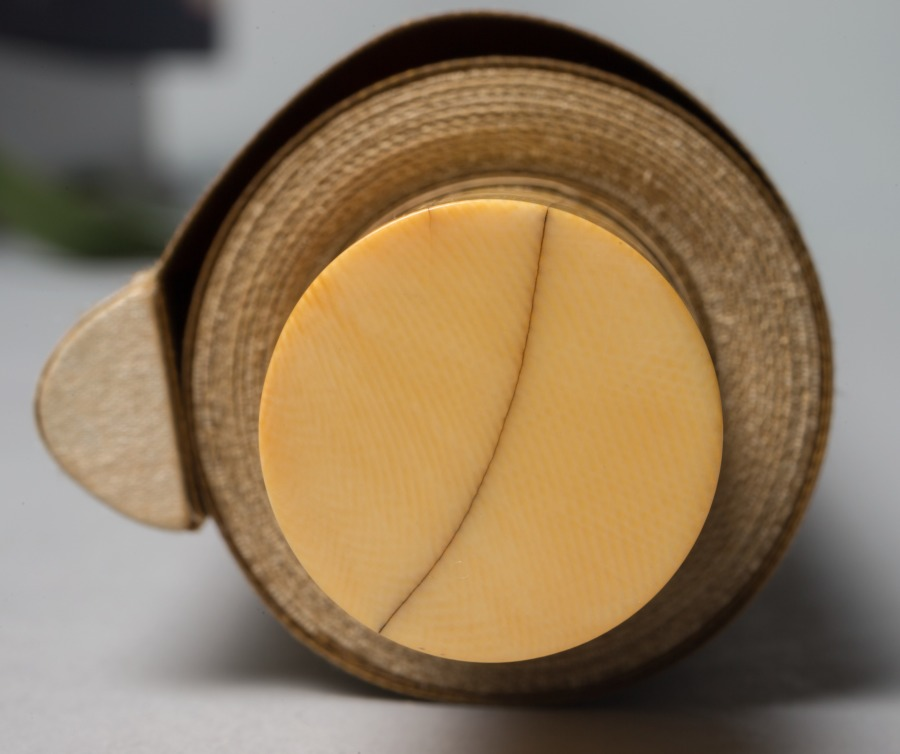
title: Puppy with Dandelions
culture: Japan, Edo period (1615–1868)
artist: studio of Tawaraya Sōtatsu (Japanese, c. 1570–c. 1640)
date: 1600–1640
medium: hanging scroll; ink on paper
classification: Painting